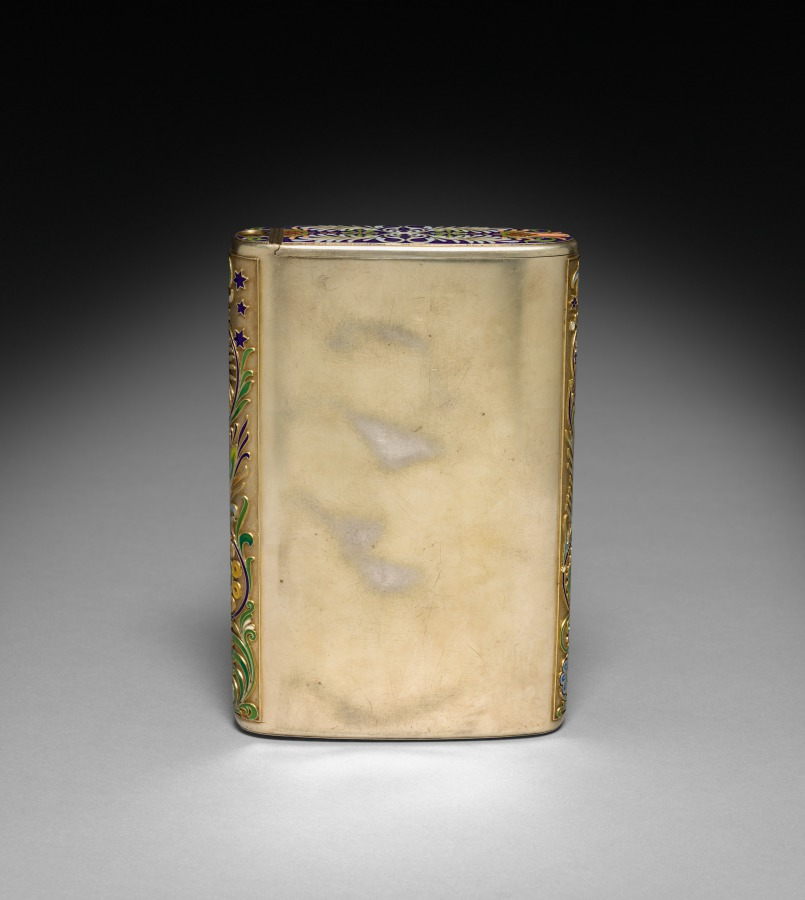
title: Cigar Box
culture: Russia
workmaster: attributed to Feodor Ivanovich Rückert (Russian, 1840–1917)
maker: House of Fabergé (Russian, 1842–1918)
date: c. 1896–1908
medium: Silver gilt, enamel, sapphire set in gold; [reproduction silk tinder cord, gold and moonstone catch]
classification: Silver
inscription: C. Fabergé (in Cyrillic); double-headed eagle [imperial warrant]; 84, Kokoshnik, tester's initials [assay mark for Moscow, 1896-1908]; scratched 16358.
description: Fabergé’s craftsmen in Moscow became known for their work in the pan-Slavic or neo-Russian taste, hearkening back to 17th-century styles of Russian folk decoration. In this whimsically oversized box for cigars or loose tobacco, Fabergé used the technique to highlight a symbol of imperial royalty, the preening peacock, here rendered in brilliant hues of blue and green enamels.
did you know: Peacocks were considered a symbol of imperial royalty in Russia.